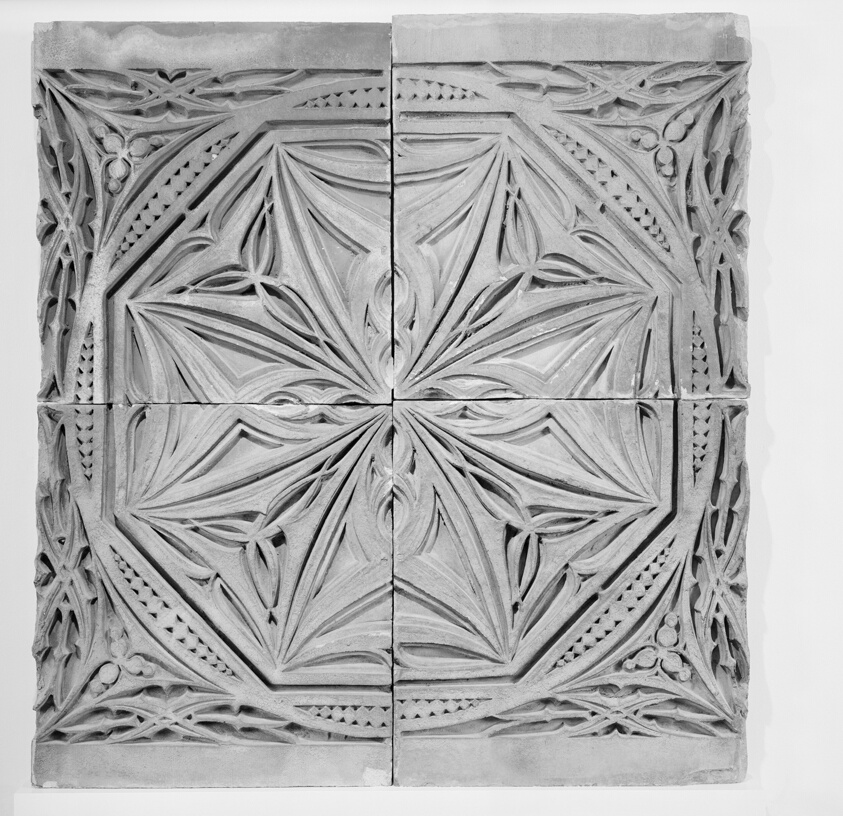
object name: Architectural fragment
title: Saint Nicholas Hotel: Spandrel Panel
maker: Adler & Sullivan, Architects, American, 1883-1895; Designer: Louis H. Sullivan, American, 1856-1924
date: 1892/93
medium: Terra-cotta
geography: Saint Louis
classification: earthenware; ceramics; architectural fragment; european decorative arts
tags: Chicago